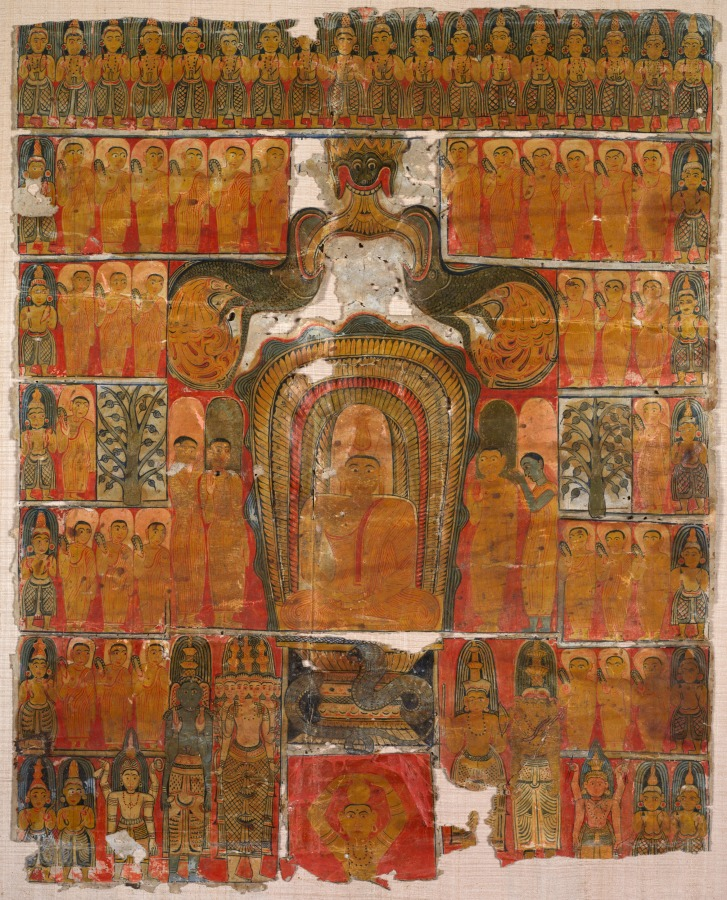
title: Blessed Lord Buddha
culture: Sri Lanka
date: c. 1825–50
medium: gum tempera on paper, varnished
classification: Painting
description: The central figure of the Buddha, radiating light and the flame of enlightenment, is flanked by his four main disciples: Sariputra and the blue Moggallana on his left, and Ananda and Anuruddha on his right. Below him is the earth goddess holding a pot of water on her head. To her right are three guardians of Sri Lanka: Kataragama (or Skanda) with six heads and twelve arms; the blue Vibhishana, younger brother of Ravana; and, smaller in size, may be Pattina holding an anklet and neem leaf. On the opposite side are three deities: Sumana, the four-faced Brahma, and four-armed Shiva with trident. Arranged around two depictions of the bodhi tree under which the Buddha reached enlightenment, rows of other monks bear garlands in veneration. Each of the standing protector divinities around the periphery grasps a bow and arrow. This painting evokes the appearance of 18th- to 19th-century murals in Sri Lankan Buddhist temple interiors, such as those at Dumbulla, with its rows of golden figures. It was probably part of a domestic shrine, along with small sculptures of the Buddha, palm-leaf manuscripts of Pali scriptures, incense, oil lamps, bells, and other offerings such as food, flowers, and water. The varnish that covers the painting may have been intended to shield it from the environment of an active place of worship.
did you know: The yellow pigment contains chromium, which was not used in pigments until 1818.